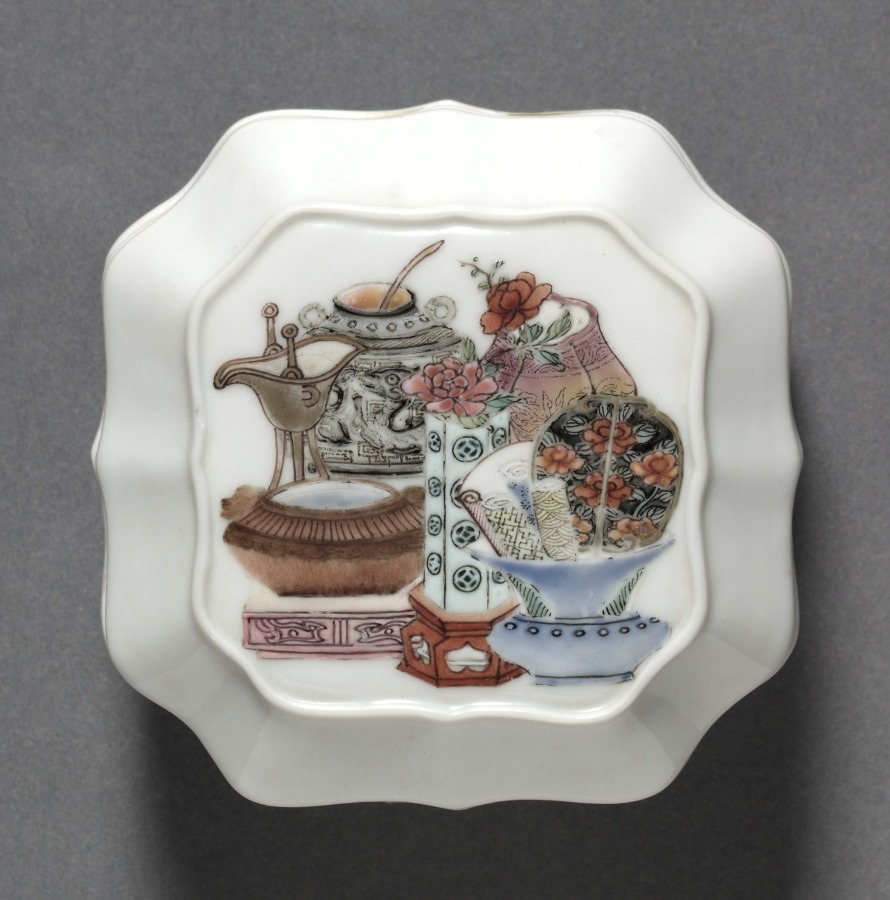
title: Square Covered Box with Hundred Antiquities (lid)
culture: China, Jiangxi province, Jingdezhen kilns, Qing dynasty (1644-1911), Yongzheng mark and reign (1723-35)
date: 1723–35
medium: porcelain with famille rose overglaze enamel decoration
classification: Ceramic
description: The painted decoration in this box cover provides an interesting image of the antiquities and objects being collected in the Chinese scholar’s desk—all of which are emblems of taste, status, and affluence. Connoisseurship, art cataloguing, art historical study, and elegant social gatherings developed alongside art collecting as part of the Chinese literati culture.